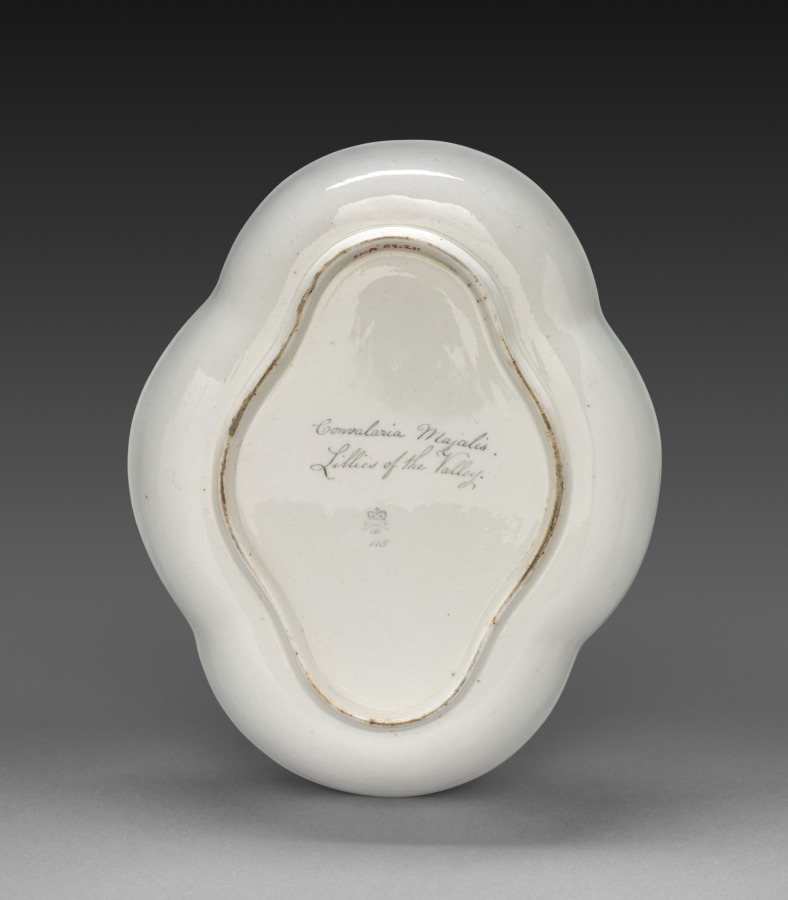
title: Quatrelobed Dish from Dessert Service: Lily of the Valley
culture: England, Derby, 18th century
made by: Derby (Crown Derby Period) (British)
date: c. 1800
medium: porcelain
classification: Ceramic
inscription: inscribed in gray on back: Convalaria Majalis./Lilies of the Valley./crown/crossed batons and dots/D/115.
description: Each dish is decorated with recognizable plants, the names of which are inscribed on the base in both Latin and English. Identifying the blossoms only became customary in the late 18th century when a single piece of porcelain was decorated with one species, and flowers were represented along with leaves, stems, seed pods, and roots. All of this reflects Carolus Linnaeus’s recent invention of a scientific method to categorize all known flora. The decorations on the Derby factory’s products derive from contemporary English botanical publications. For instance, illustrations in William Curtis’s The Botanical Magazine served as models for the French marigold and nettle-leaved bell flower on the dessert service.